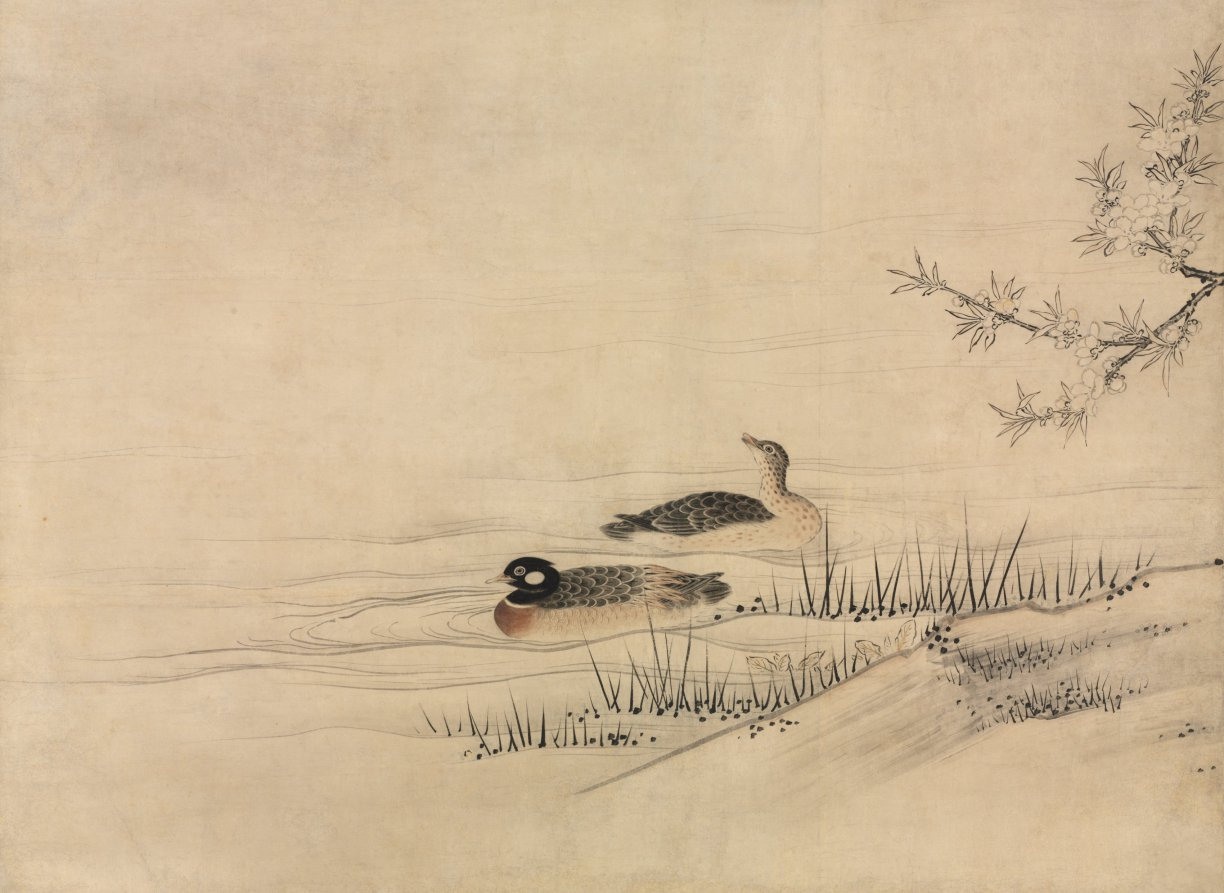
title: Flowers and Birds in a Spring Landscape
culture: Japan, Muromachi period (1392–1573)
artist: attributed to Kano Motonobu (Japanese, c. 1476–1559)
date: 1500s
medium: One of a set of sliding door panels mounted as hanging scrolls; ink and color on paper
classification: Painting